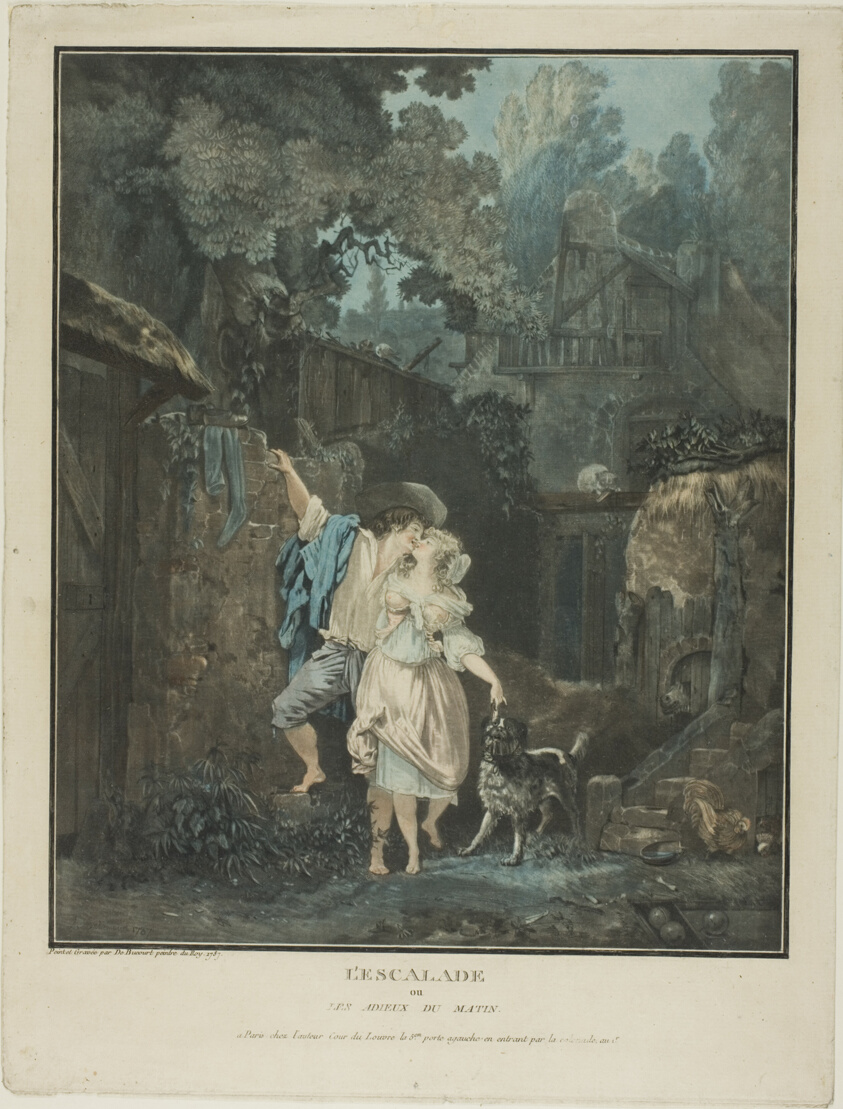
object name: Print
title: The Climb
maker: Philibert Louis Debucourt (French, 1755-1832)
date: 1787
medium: Color aquatint with etching and engraving in black ink on cream laid paper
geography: France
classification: aquatint; print; prints and drawing